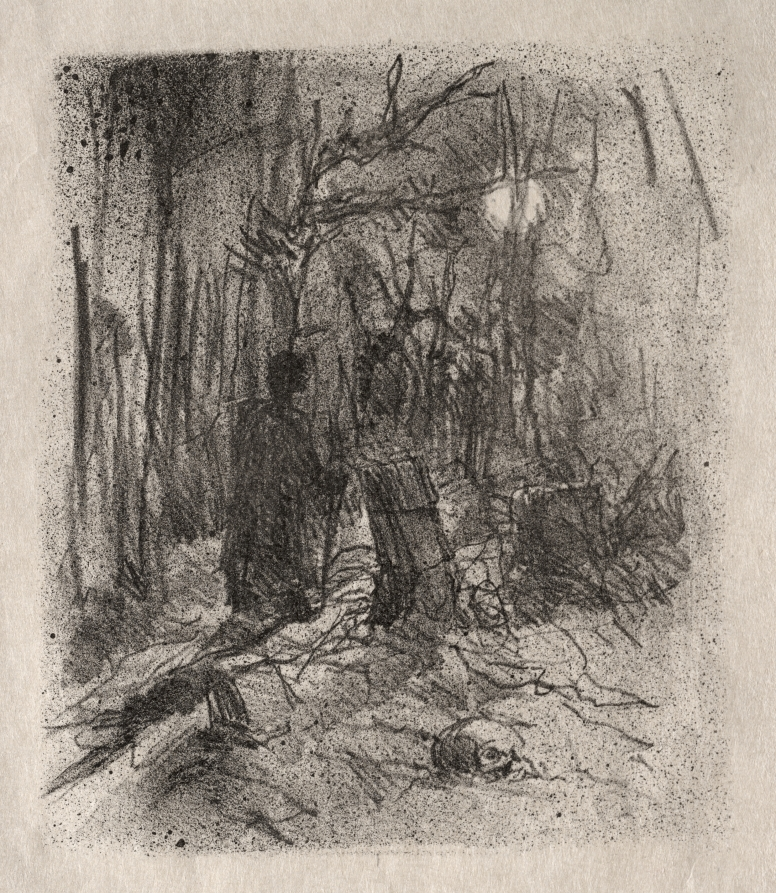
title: La Cimetière de Busk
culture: France, 19th century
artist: Henri de Toulouse-Lautrec (French, 1864–1901)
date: 1898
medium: lithograph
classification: Print